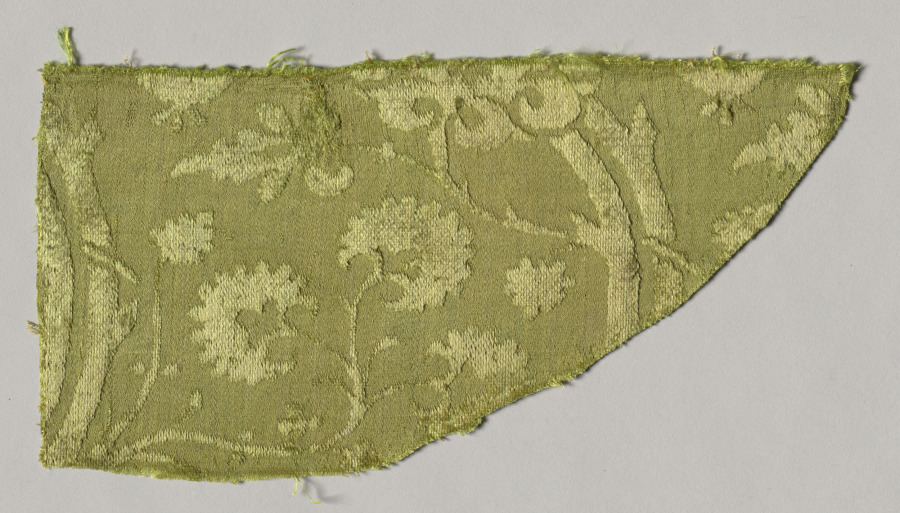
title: Fragment of a Chasuble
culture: Italy, beginning of the 15th century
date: 1400–1420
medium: velvet (cut and voided); silk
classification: Velvet